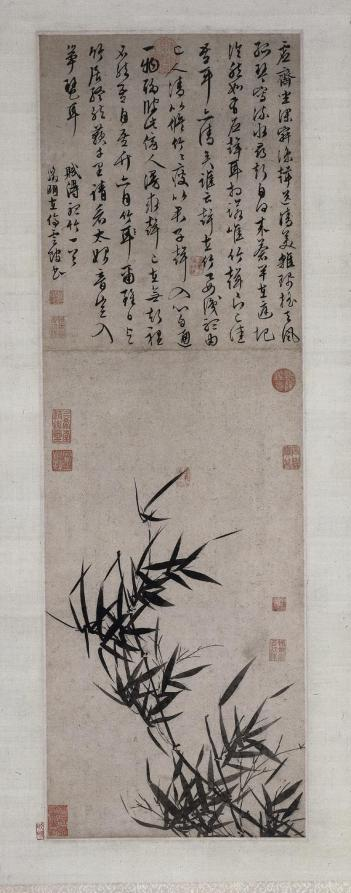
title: Listening to the Bamboo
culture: China, Ming dynasty (1368–1644)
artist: imitator of Wen Zhengming (Chinese, 1470–1559)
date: late 1400s-1500s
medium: hanging scroll, ink on sutra paper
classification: Painting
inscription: Artist's inscription, signature, and 2 seals on the separate sheet of paper above the painting: In the empty studio sitting in deep loneliness;/ Like cool sound sending pure beauty,/ Or pendants swinging in the wind,/ Or a solitary qin suggesting running water./ Where is that sound from?/ The green poles in the courtyard,/ Clear and light like an echo,/ The sound and ears are in tune./ The sound of bamboo now very beautiful;/ My ears are also clear./ Who says the sound is in the bamboo?/ To know it depends on oneself./ A noble person is like a tall bamboo;/ A thin bamboo is like the noble man./ When the sound enters, the mind responds,/ Only one thing but artificially separated./ A bystander searching for the sound,/ But the sound can only be found in silence./ Otherwise I am still I,/ Bamboo is still bamboo./ Even if I live with bamboo every day,/ Still the music will be a thousand miles away./ Look at sound's most primeval source:/ Did it enter a zither or a lute? Composing a poem on Listening to the Bamboo. Written by Zhengming at the Ting yun guan. Wen Zhengming [2 seals] Wen Zhengming yin 文徵明印; Wei geng yin wu yi jiang 惟庚寅吾以降.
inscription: [印] 文徵明印; 惟庚寅吾以降.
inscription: 5 seals of the Qianlong emperor (r. 1736-95)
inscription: [印] 金粟山藏經紙